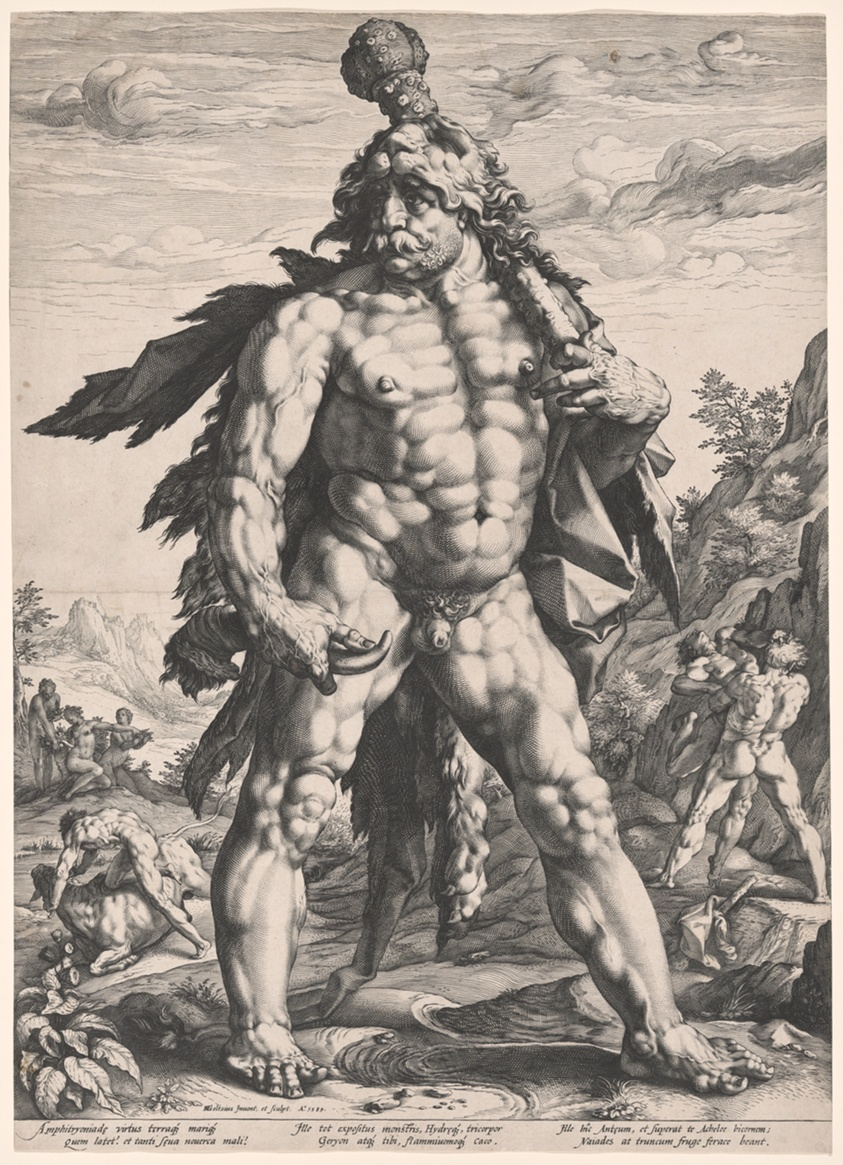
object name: Print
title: The Great Hercules (Knollenman)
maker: Hendrick Goltzius (Dutch, 1558–1617)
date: 1589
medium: Engraving on ivory laid paper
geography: Netherlands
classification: engraving; paper; print; prints and drawing